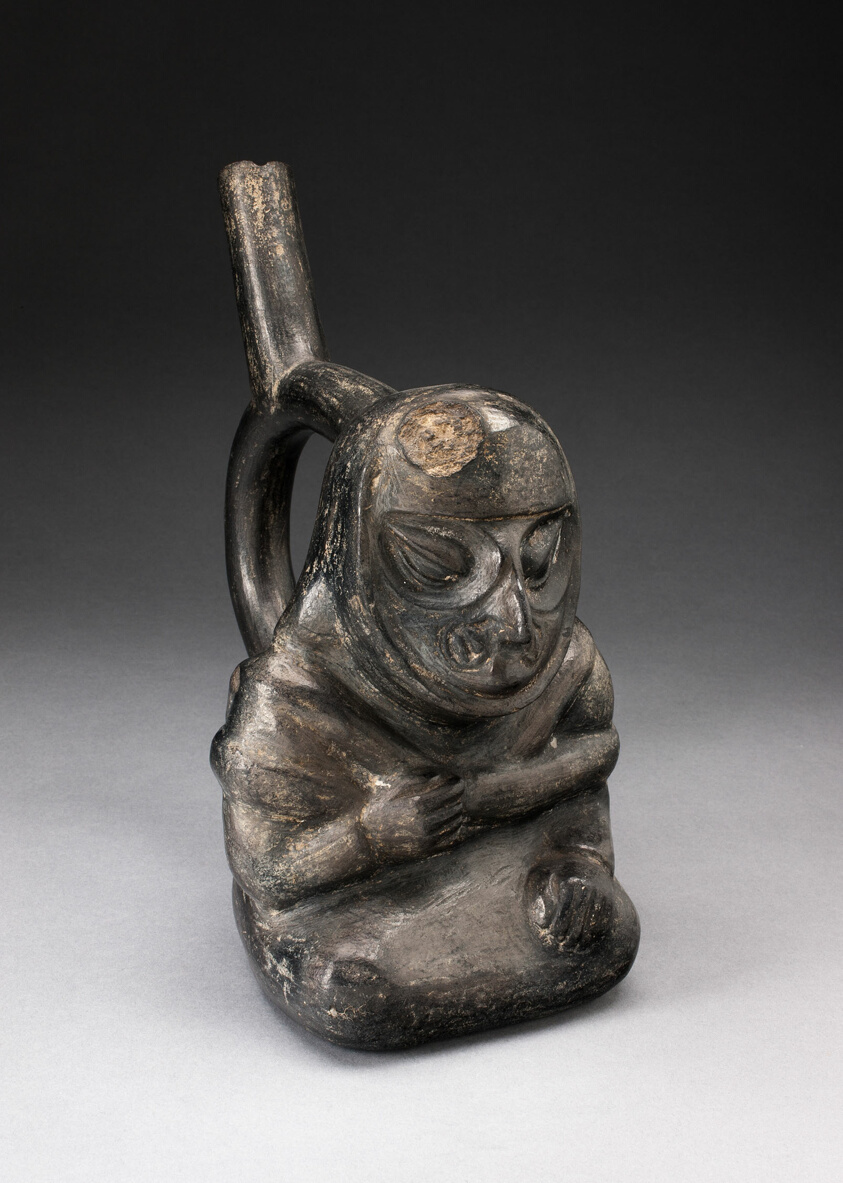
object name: Vessel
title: Handle Spout Vessel in the Form of a Seated Anthropomorphic Owl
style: moche, Arts of the Americas, andes, south american, andean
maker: Moche (Chimbote, Santa Valley, north coast, Peru)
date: 100 BCE–500 CE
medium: Ceramic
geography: Peru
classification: earthenware; ceramics; vessel; art of the americas